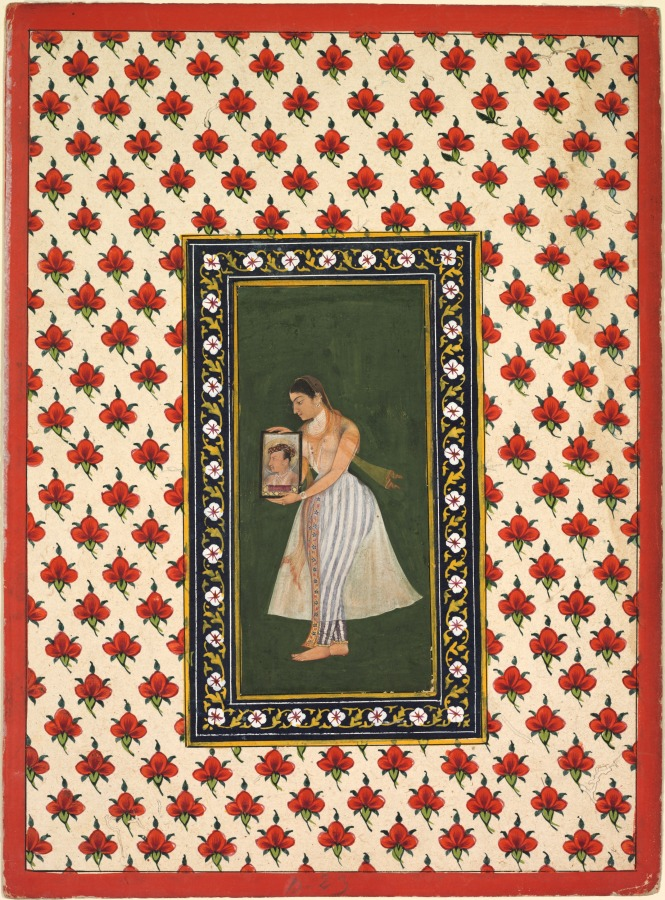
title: Nur Jahan holding a portrait of Emperor Jahangir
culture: Mughal India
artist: attributed to Bishandas (Indian)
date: c. 1627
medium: gum tempera and gold on paper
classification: Painting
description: A woman identified as the favorite wife of the Mughal emperor Jahangir (reigned 1605–27) holds a formal portrait of her husband. He appears aged with graying facial hair behind the jharokha carpet that marks imperial presence. This painting may be modeled on a work depicting Jahangir holding a portrait of his deceased father, showing himself to be the legitimate successor. Nur Jahan, who handled most of the affairs of state, hoped to remain in power after his death. She is depicted in her idealized youth, since she would have been 50 years old when Jahangir died.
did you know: Jahangir died at 58, outliving his younger brothers by about 25 years.